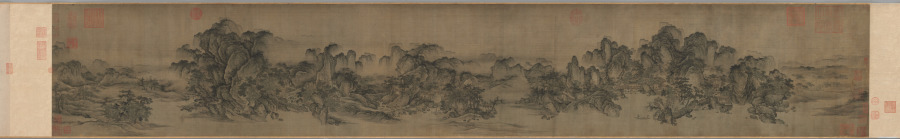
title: Streams and Mountains without End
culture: China, late Northern Song dynasty (960-1127) - Jin dynasty (1115-1234)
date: 1100–1150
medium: handscroll; ink and slight color on silk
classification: Painting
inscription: 9 colophons and 48 seals: 1 colophon, dated 1205, of Wang Wenwei 王文蔚 (dates unknown); 1 colophon, dated 1205, of Li Hui 李惠 (dates unknown); 1 colophon of Weiluo Tian Xie 蔚羅田獬 (dates unknown); 1 colophon, dated 1214, of He Yan 何言 (dates unknown); 1 colophon, dated 1326, of Cao Yuanyong 曹元用 (d. 1329) 1 colophon, dated 1332, of Kangli Zishan 康里子山 (Naonao; 1295-1345); 1 colophon, dated 1336, of Liu Zai 劉載. (dates unknown); 1 colophon, dated 1380, and 4 seals of Yang Mao 楊懋 (1300-after 1380); 4 seals of the Hou family (ca. 1340); 1 colophon of Wang Duo 王鐸 (1592-1652); 4 seals of Zhang Bingqian 張秉乾 (juren of 1729); 8 seals of Liang Qingbiao 梁清標 (1620-1691); 2 seals of the Qianlong emperor (r. 1736-95); 4 seals of the Jiaqing emperor (r. 1796-1820); 3 seals of the Xuantong emperor (r. 1909-11); 2 seals of Ye Gongchuo 葉恭綽 (1881-1968); 17 seals of Zhang Yuan 張爰 (Zhang Daqian 張大千, 1899-1983).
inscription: Colophon 1. Wang Wenwei 王文蔚. Dated third month and third day, 1205, under the reign of Zhangzong of the Jin dynasty. 造物元無心，山川秀氣聚。畫手亦無盡，各出新意度。 誰將妙林泉，淡墨寫縑素。重巒疊嶂間，三兩人家住。 茅舍隔素籬，小橋通細路。溪上數葉舟，雅有物外趣。 嵓崦藏招提，依稀認窗戶。山色四時宜，雲煙自朝暮。 不知塵世中，此景在何處。收拾買山錢，投老好歸去。 泰和乙丑三月三日平原王文蔚謹再拜，書于河東縣署之野趣堂。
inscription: Colophon 2. Li Hui 李惠. The colophon was written three days before the Qingming Festival in 1205. 畫師慣在山中居，含毫吮墨聊自娛。 閑將一段冰霜絹，寫出千里江山圖。 前山後山互出沒，山腰林樾相縈紆。 危橋澗溜瀉鳴玉，山根一匯為平湖。 波平短艇快漁釣，雲深細徑來樵蘇。 僊宮梵宇占幽勝，雕欄複閣森蓬壺。 往來行客煙靄外，飄飄野店青帘孤。 人家雞犬聲相接，熙熙化日安唐宇。 嗟余嗜好何其迂，膏肓泉石真吾徒。 一行作吏墮世網，薄書汨沒勞奔趨。 千巖萬壑但夢想，故園三徑應將蕪。 披圖暫洗黃塵眼，拊膺三嘆空踟躕。 泰和乙丑清明前三日絳臺李惠書于舜城府署之九思堂。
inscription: Colophon 3. Weiluo Tian Xie 蔚羅田獬. 畫工紛紛不可紀，擺脫俗流幾人耳。 夫誰援筆掃鵝溪，一段風煙且千里。 白波青嶂渺無窮，水接山兮山插水。 小橋野店相勾連，古寺樓臺突兀起。 飄然氣象與神俱，但患未明孰姓氏。 郭熙雖老典型存，為問主公無乃是。 此畫世希當寶藏，無與碌碌同一視。 更看卷首數公詩，奇絕清新相表裏。 蔚羅田獬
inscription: Colophon 4. He Yan 何言. Written in 1214. 萬有來自無，一真歸所託。畫師得三昧，胸中幻丘壑。 百態逐墨破，群形隨筆落。地近迹分明，天遙痕隱約。 雲物自吐吞，峯巒非斧鑿。江鄉閴無市，谷關常不鑰。 中有野夫閑，童琴而歩鶴。酒斾出籬懸，漁舟臨岸泊。 澗樹蔽橋樑，巖松迷殿閣。岑疊宿霧重，野曠林煙薄。 危棧接縈紆，亂泉通脈絡。途中人往來，僕馬何羸弱。 怪石虎踡跼，古木龍蟠錯。一幅宜好收，千金非易博。 玉堂閑卷舒，眼界增寥廓。視險尚寛平，見危除慘虐。 氣象溢國華，川澤資廟略。功名業已書，歸去鞭先著。 但知色即空，何是今非昨。飽乎仁智心，箇中無限樂。 貞祐甲戌秋暮，東營何言題。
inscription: Colophon 5. Cao Yuanyong 曹元用 (d. 1329). Dated 1326. 岸擁危橋斷，溪浮小艇斜。 萬山最深處，依約兩三家。 泰定丙寅秋，曹元用題。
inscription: Colophon 6. Kangli Zishan 康里子山 (i.e., Kangli Naonao). The colophon bears a date of 1332. 右溪山圖，意韻蕭灑。一見使人有烟霞之想，真可珍藏。又有□金諸名勝題詩其左。兵火之餘， 殊不易得也。 至順三年暮春之月，康里子山跋。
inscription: Colophon 7. Liu Zai 劉載. 雲拂埜田閑種玉，雨餘巖溜碎傾金。 幾時也結團茆去，麟閤恬然不挂心。 至元二年正月，長安劉載載之謹錄上。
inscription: Colophon 8. Yang Mao 楊懋 (1300–after 1380). 觀此圖，經營位置，筆法高古，山明石潤。其橋梁、路道、樹林、人物、遠近；一一誠得真山水之深趣。非當時名筆有大才者不能至此。不必問其誰何，可為神品。况宋金元三朝名公所跋，尚不能記，想其來尤遠矣。然而物經累變而尚存，是物之有壽者也。余不復再論。文顯其保之。洪武庚申春，八十翁楊懋觀。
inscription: Colophon 9. Wang Duo 王鐸 (1592–1652). 文蓀親翁博雅，文詩鴻暢。舍弟持此喜觀，遂抽管題數語： 山勢委折，筆墨無痕。宋人中如此不多見也。譬之兵家，當是韓白。王鐸。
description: Streams and Mountains without End was a landmark acquisition of 1953, made just a year after Sherman Lee had returned to Cleveland as curator of Oriental art. He acquired it with the intention to provide "a more than adequate foundation for a fine collection of Chinese landscape painting." This impressive work demonstrates the culmination of stylistic developments in Chinese monumental landscape painting following the Northern Song tradition. It represents a journey through a landscape, making it a fitting metaphor for Lee’s journey of discovery and achievement over a lifetime.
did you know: The portrayal of the distant lands is rich with details like pavilions, villages, and human activities.